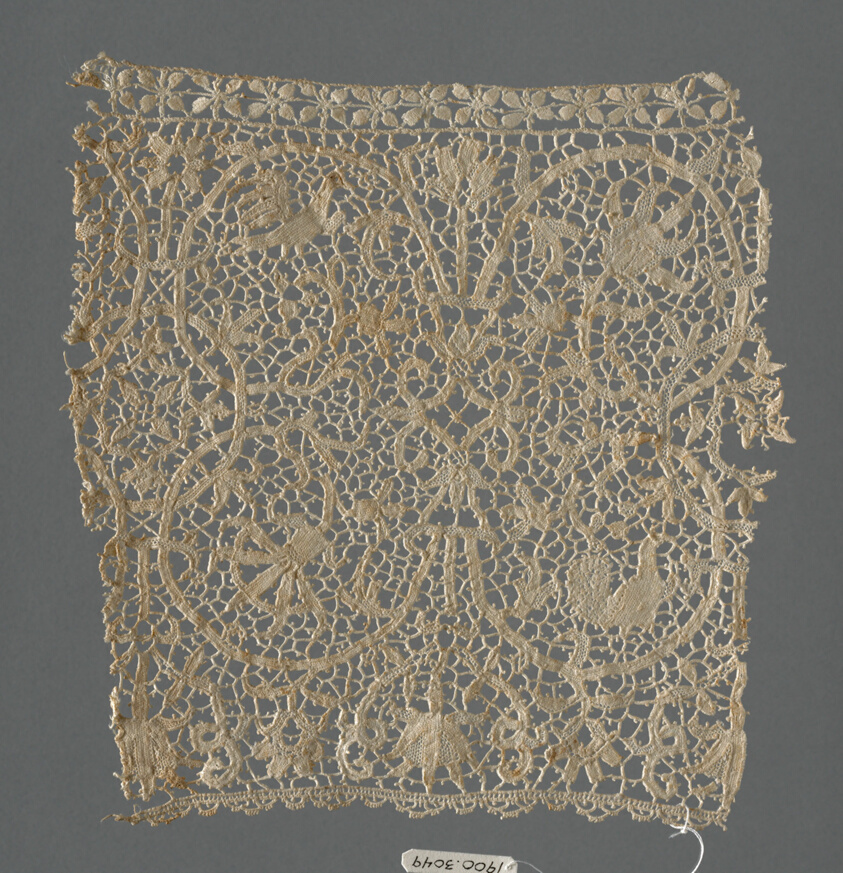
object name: Textile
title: Border (Fragment)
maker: Italy, probably Venice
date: 1625/50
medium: Linen, needle lace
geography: Venice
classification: textile; lace - needle